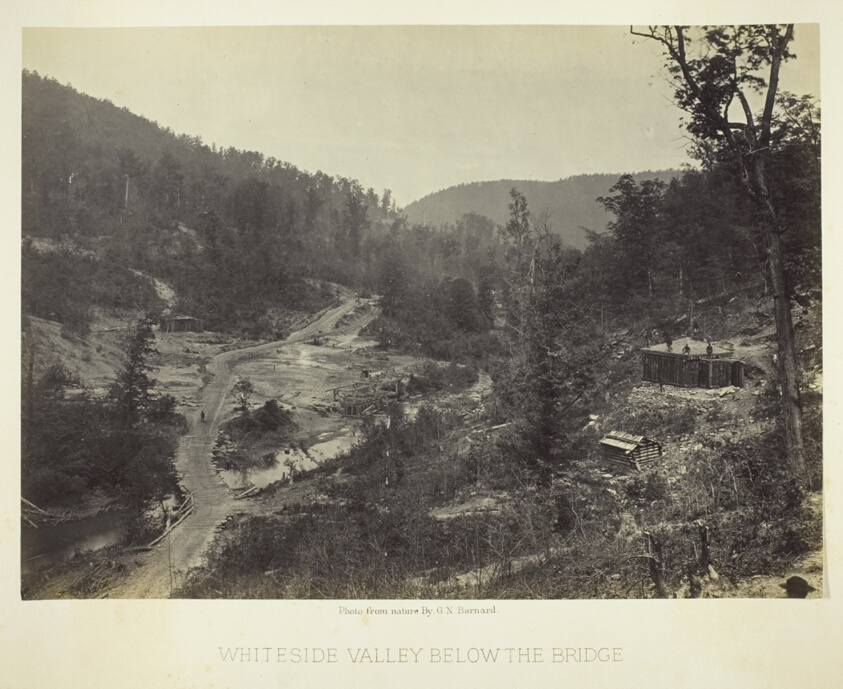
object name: Photograph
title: Whiteside Valley below the Bridge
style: 19th century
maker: George N. Barnard (American, 1819–1902)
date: 1864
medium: Albumen print, plate 5 from the album "Photographic Views of the Sherman Campaign" (1866)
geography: United States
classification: albumen silver print; photographic process; photography; photograph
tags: Collected by Hugh Edwards, Sherman's Campaign 1866